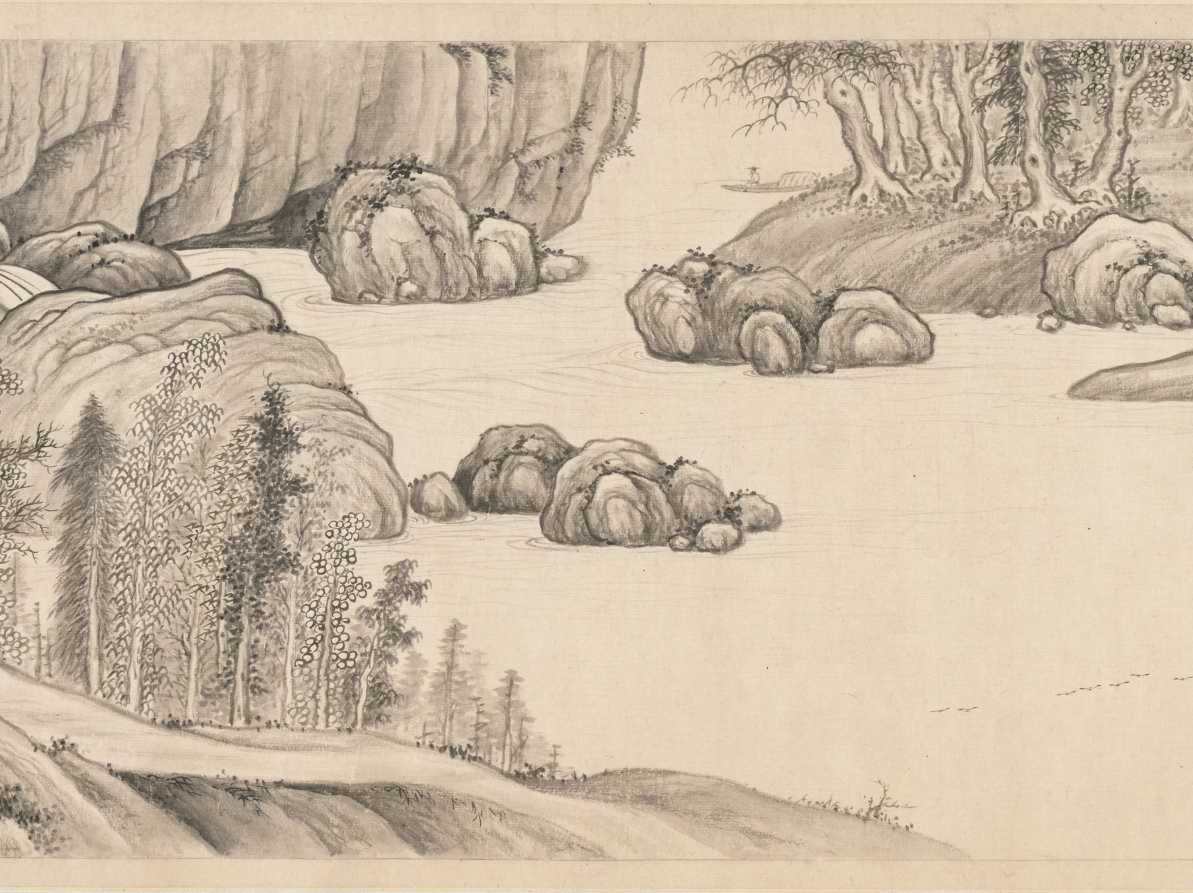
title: Meditative Visit to a Mountain Retreat: In Picture and in Words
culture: China, Ming dynasty (1368–1644)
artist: Xiang Shengmo (Chinese, 1597–1658)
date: 1648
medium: handscroll; ink on paper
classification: Painting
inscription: Artist's title and 3 seals (in front of painting): [title] Meditative Visit to a Mountain Retreat: In Picture and in Words 巖栖思訪圖詠 [3 seals] Tian lai ge zhong wen sun 天籟閣中文孫; Xiang shi kong zhang zui xin han mo 項氏孔彰醉心翰墨; Qing fu yuan zhong di yi miao ye 清福緣中第一妙業.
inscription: [印] 兔烏叟; 考古正今. 觀斯人兮何逍遙，非逍遙兮思其友。 思其友兮天一方，欲一訪之難回首。 松耶柏耶稱後凋，巖穴霏微何二酉。 山兮水兮人悠悠，遠莫致之神交否？ 河關一向望不及，言笑于今更非偶。 問游魚兮樂何深？問飛鳥兮歸何藪？ 問猿鶴兮何親疎？問鹿豕兮何夭壽？ 問白雲兮從何來？問流泉兮向何走？ 問漁樵兮何江山？問草木兮何畝畎？ 問春秋兮何炎涼？問世人兮何長久？ 問日月兮何晦明？曾見當時烏兔叟？ 戊子嘉平之初偶作此圖并題。 胥樵項聖謩識。 [印] 兔烏叟; 項氏孔彰; 未喪斯文.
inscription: 13 additional seals: 4 of Tang Zuomei 唐作梅 (late 18th–19th century); 3 of Zhang Baixi 張百熙 (1847–1907); 4 of Zhang Heng 張珩 (1915–1963); 2 unidentified.